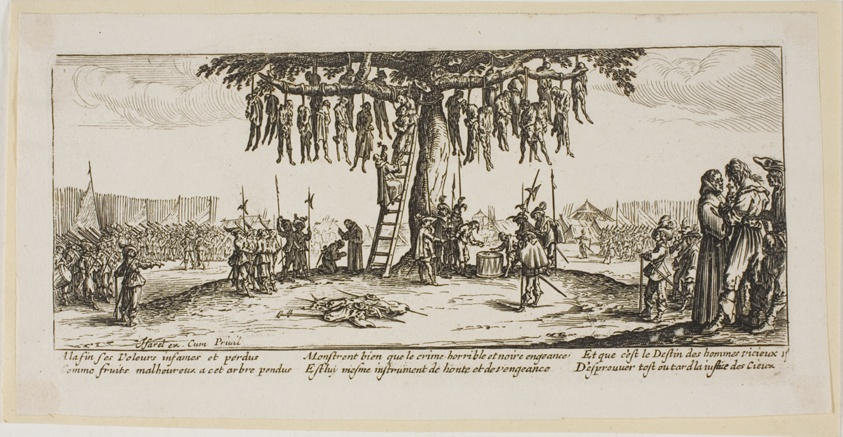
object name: Print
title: The Hanging, plate eleven from The Large Miseries of War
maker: Gerrit Lucasz van Schagen (Dutch, born 1642); after Jacques Callot (French, 1592-1635)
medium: Etching on paper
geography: Netherlands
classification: etching; print; prints and drawing